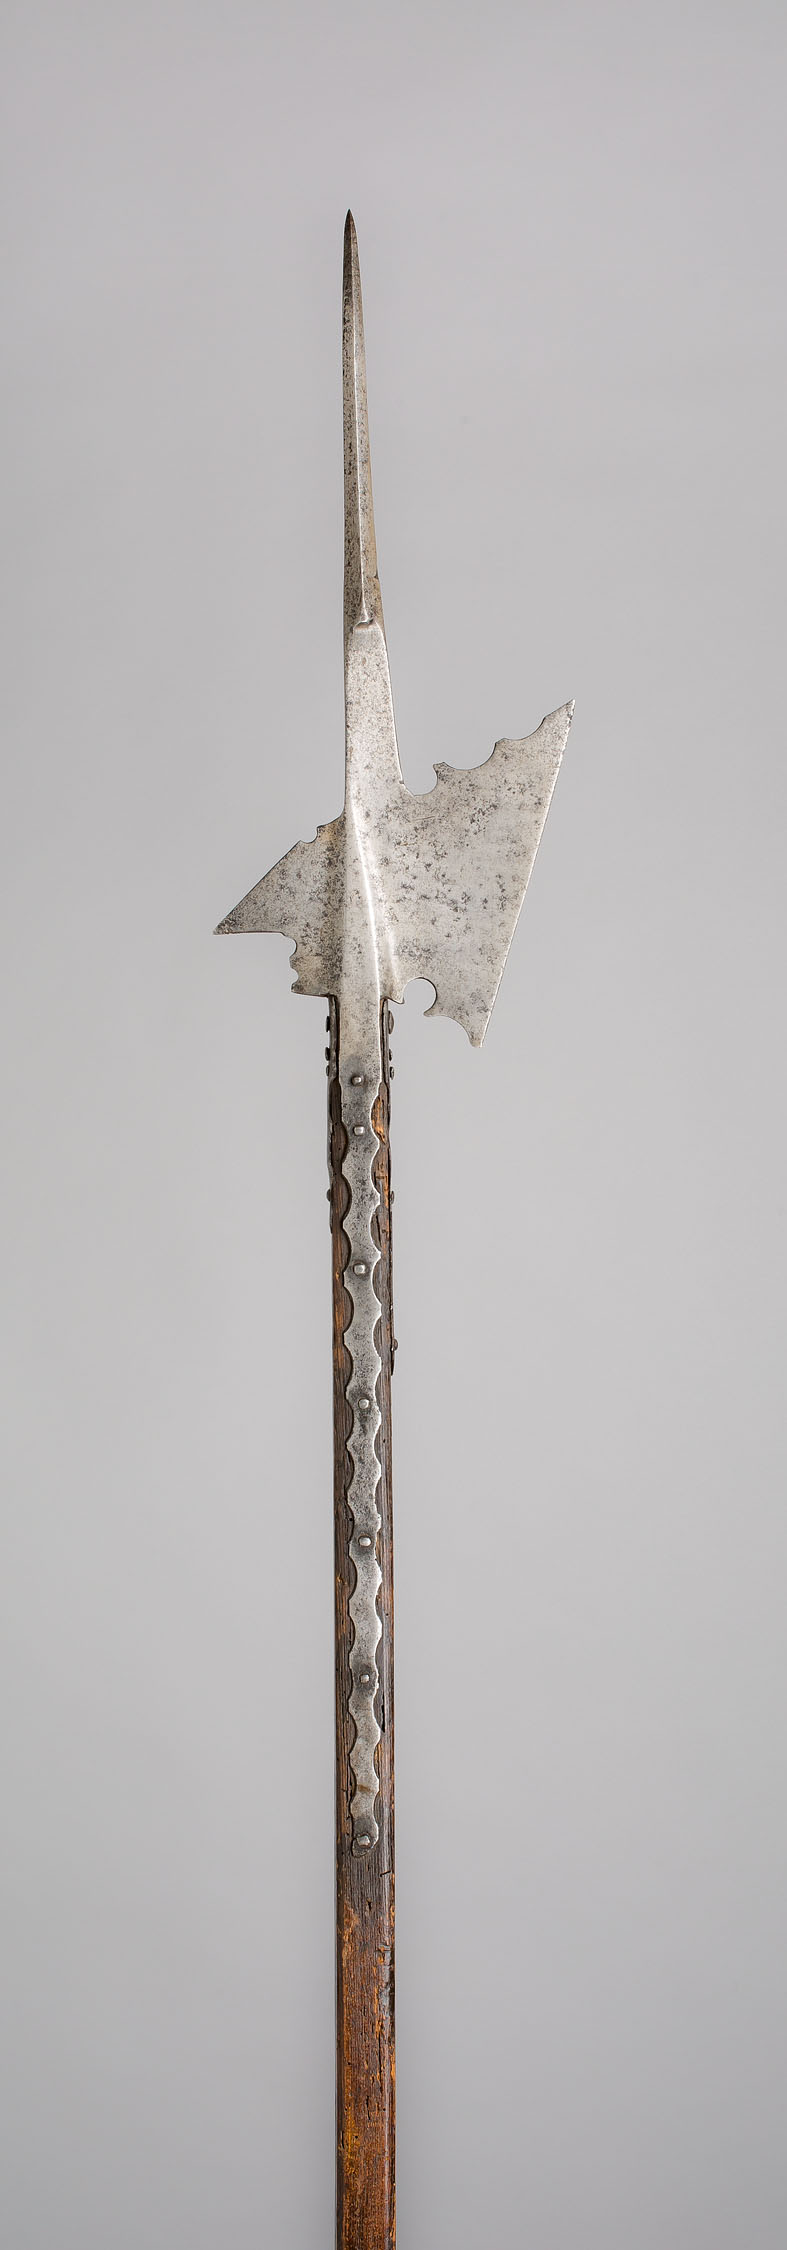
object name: Arms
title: Halberd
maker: Possibly French or German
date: 1540/60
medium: Steel and wood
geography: Germany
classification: edged weapon-staff; arms; arms and armor